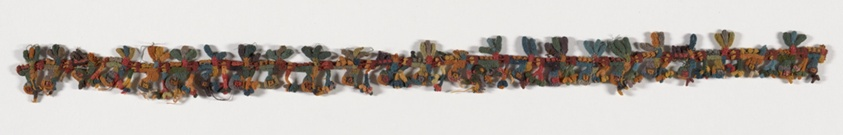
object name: Textile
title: Border Fragment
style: nazca, andean, andes, Pre-Columbian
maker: Nazca; South coast, Peru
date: 100 B.C./A.D. 200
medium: Wool (camelid), tubular cross-knit looping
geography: Peru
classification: textile; weaving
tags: super/natural